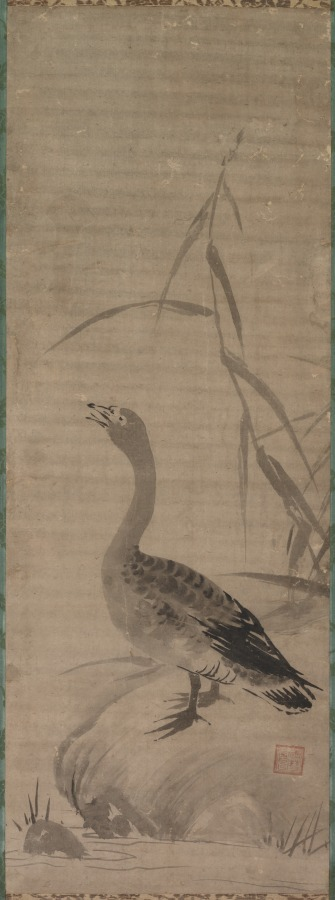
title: Goose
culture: Japan, Edo period (1615–1868)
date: c. 1615–99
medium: hanging scroll; ink on paper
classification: Painting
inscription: spurious seal of Sesshu, lower right.